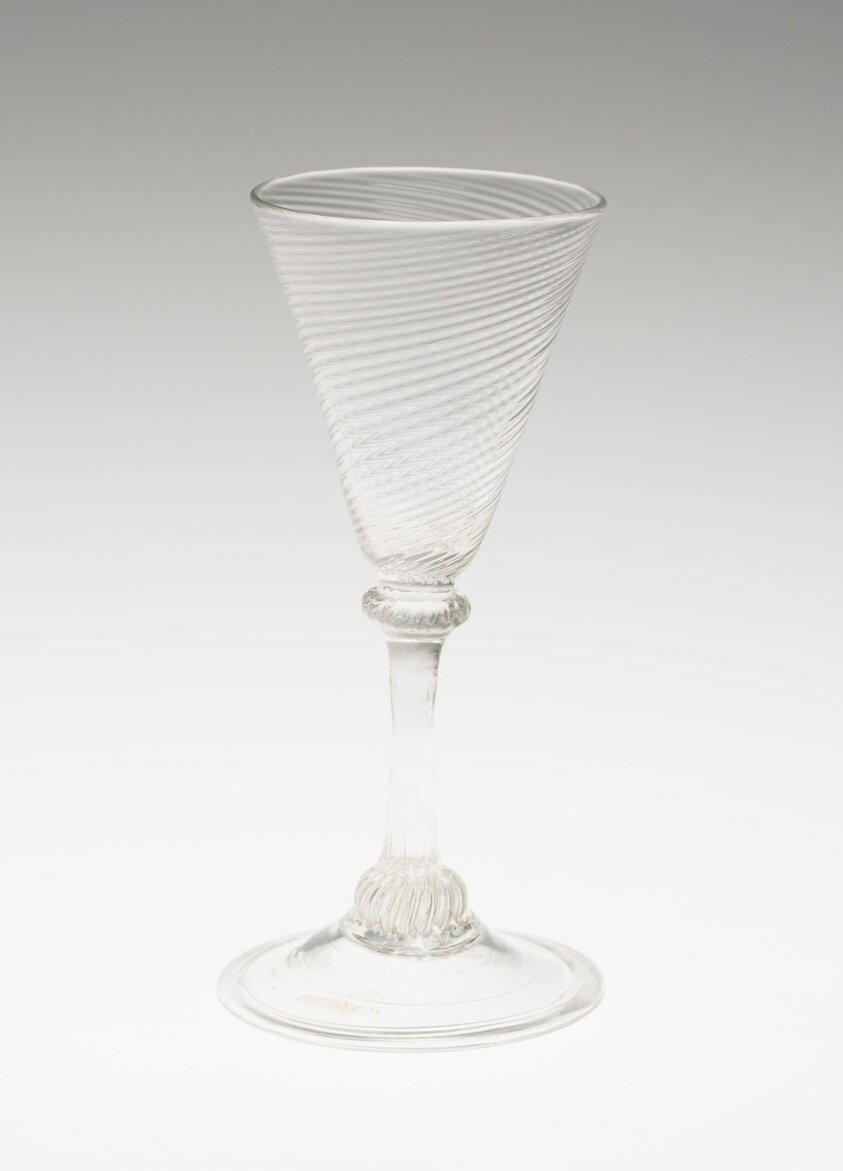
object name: Glass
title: Wine Glass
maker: Possibly Europe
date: 1700/50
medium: Glass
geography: Europe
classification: drinking vessel; glass